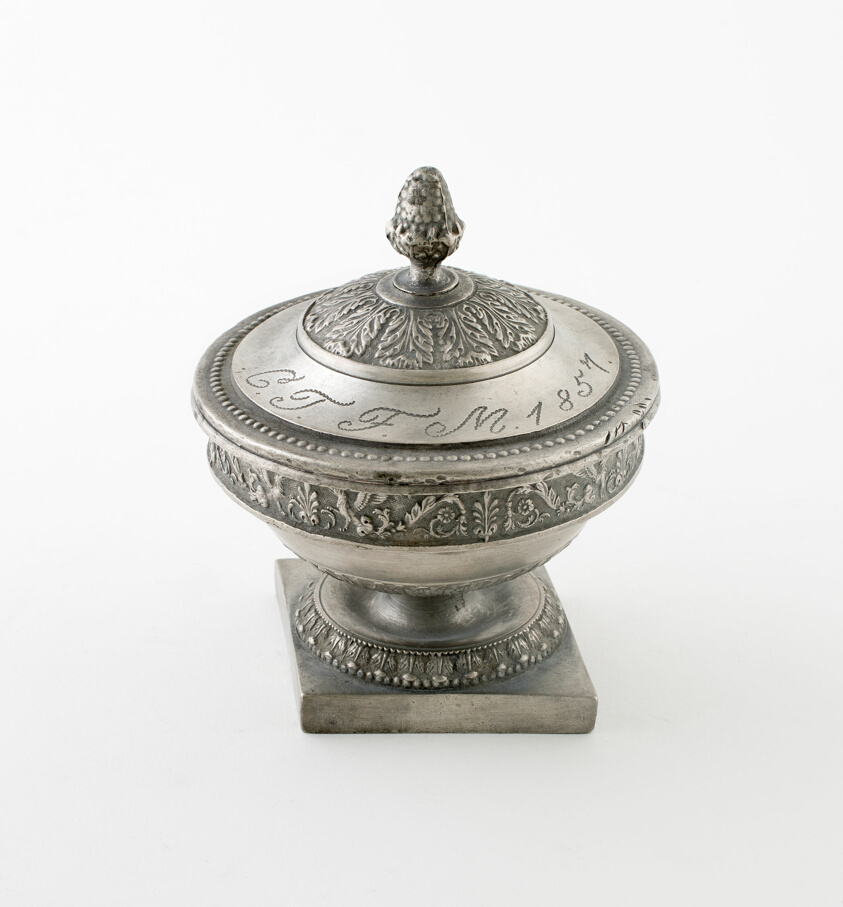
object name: Metalwork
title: Covered Urn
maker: Possibly Germany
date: Mid 19th century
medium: Pewter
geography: Germany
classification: pewter; metalwork; european decorative arts